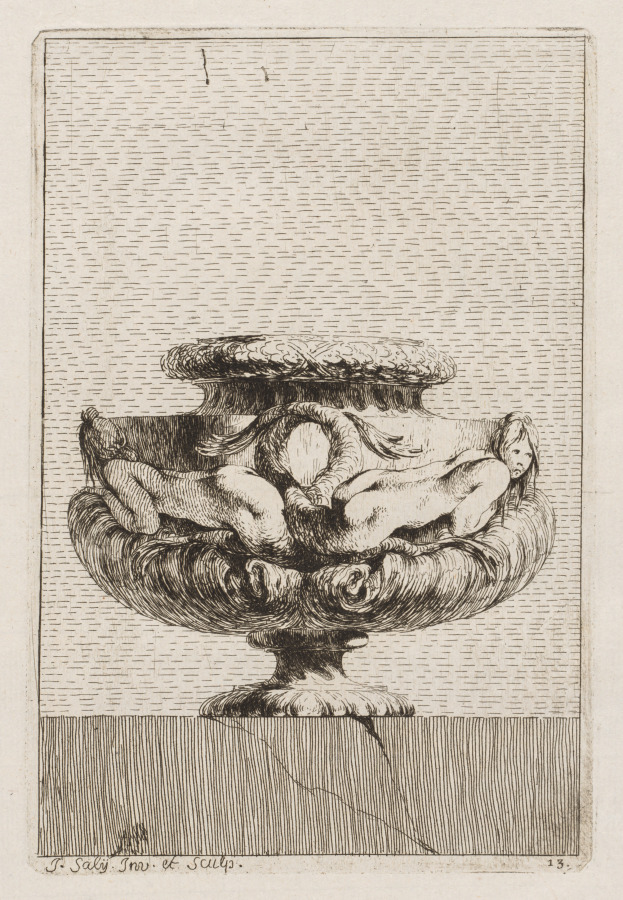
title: Suite of Vases: Plate 13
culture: France, 18th century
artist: Jacques François Saly (French, 1717–1776)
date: 1746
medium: etching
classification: Print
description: Designing ornamental vases or urns was particularly popular during the mid-18th century since the only limit to the possibilities was the imagination of the artist. Saly, a sculptor by training, was a student at the French Academy in Rome from 1740 to 1746, at which time he published a set of 30 etchings. Saly began with basic antique vase forms but deviated from classical ornament to use a rich variety of fantastic creatures for embellishment.